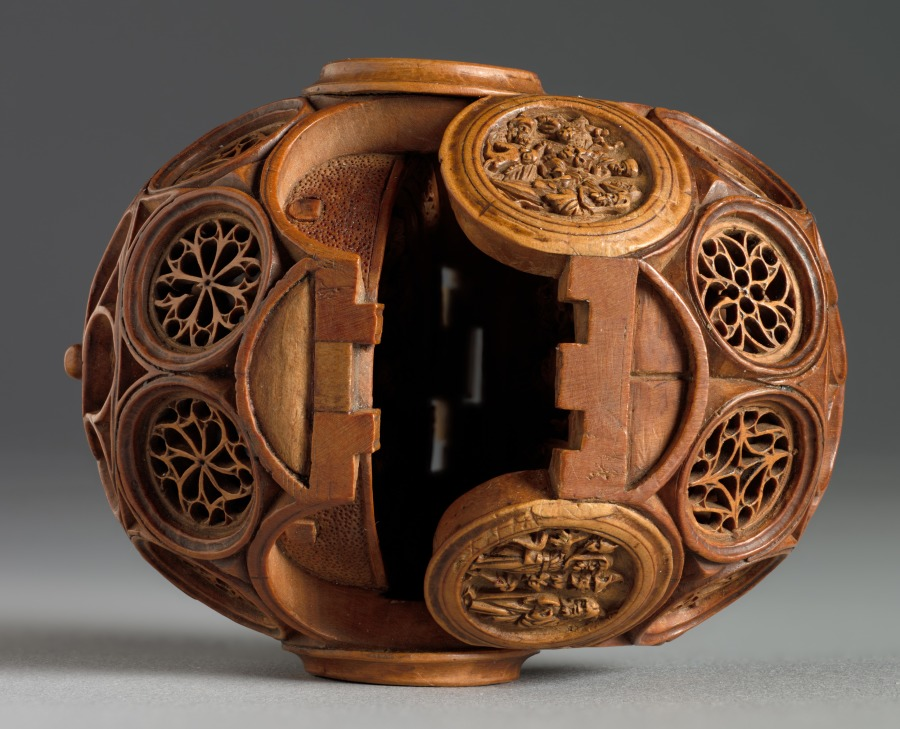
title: Prayer Nut with Scenes from the Life of St. James the Greater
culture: Northern Netherlands (Holland)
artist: Adam Dircksz (Netherlandish, active c. 1500)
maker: and Workshop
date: c. 1500–1530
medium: boxwood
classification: Sculpture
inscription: Interior around lower half: SANCTVS SACRILEGI STAT IVDICIS ANTE TRIBVNAL (Holiness stands before the throne of the profane judge)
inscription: Interior, around upper half: GAVDENS PRO CRISTO IACOBVS SVBDIT CAPVT ENSI (St James submits his head to the sword)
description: Prayer nuts are capsules that can be opened in half and were mainly worn from the end of the 1400s until 1530, particularly in the Netherlands. These objects are generally made from boxwood and carved with extreme refinement and delicacy. They often echo Gothic architecture and include openwork tracery or elaborate decorative patterns. Prayer nuts came into fashion for private devotion as a pendant on the rosary or on a decorative chain. The emergence of prayer nuts went hand in hand with the practice of praying the rosary more frequently at the end of the Middle Ages.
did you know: This miniature masterpiece was held and caressed within the palm of the holder as they prayed and meditated on their faith. What do you use to focus or engage in quiet concentration?